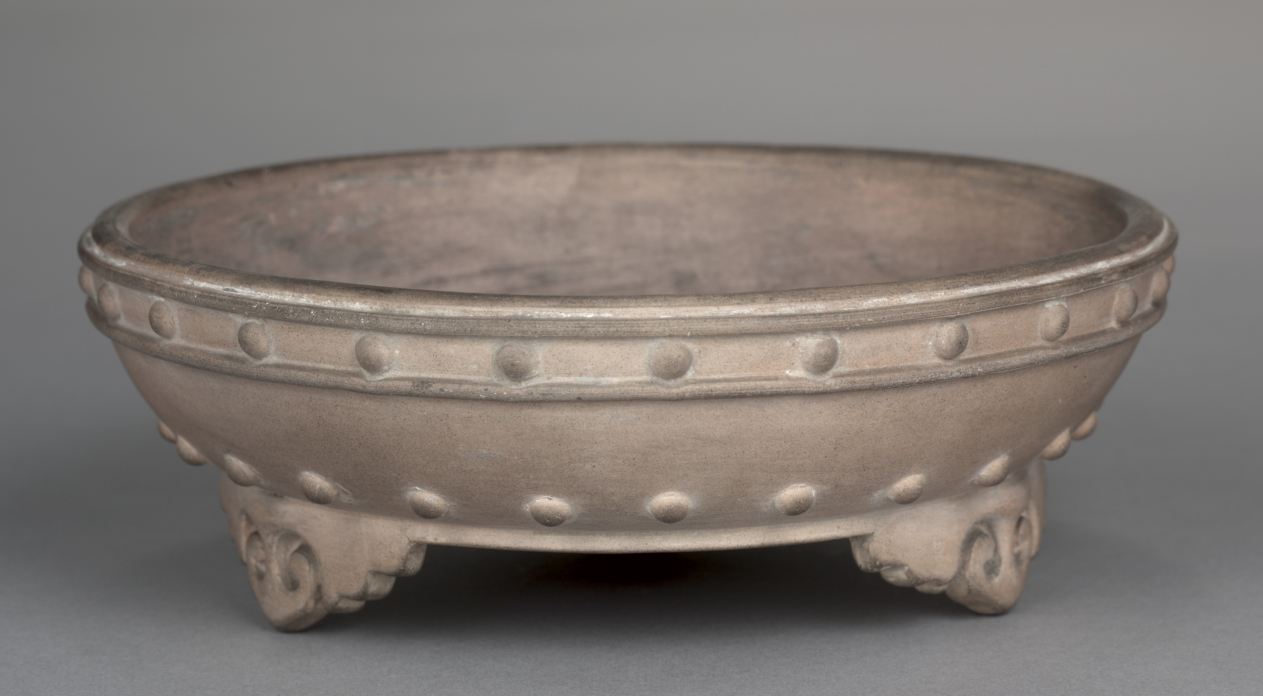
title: Bulb Bowl: Jun Type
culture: Northern China, Song dynasty (960-1279)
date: 960–1279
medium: unglazed ceramic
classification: Ceramic